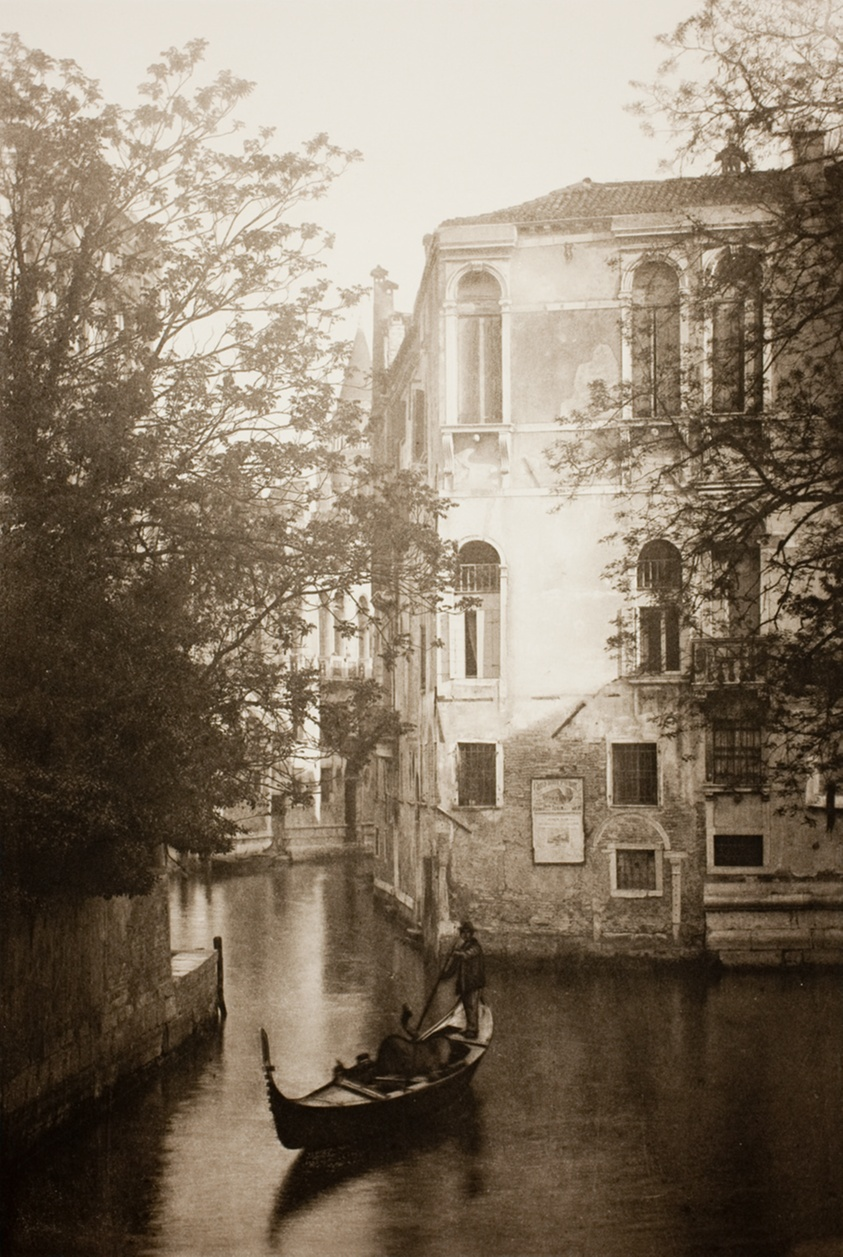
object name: Photograph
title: Untitled (II 13)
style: 19th century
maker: edited by Ferdinando Ongania; Italian, 1842–1911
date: c. 1890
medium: Photogravure, No. II 13 from the portfolio "Calli, Canali e Isole della Laguna"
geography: Italy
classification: photograph; photography